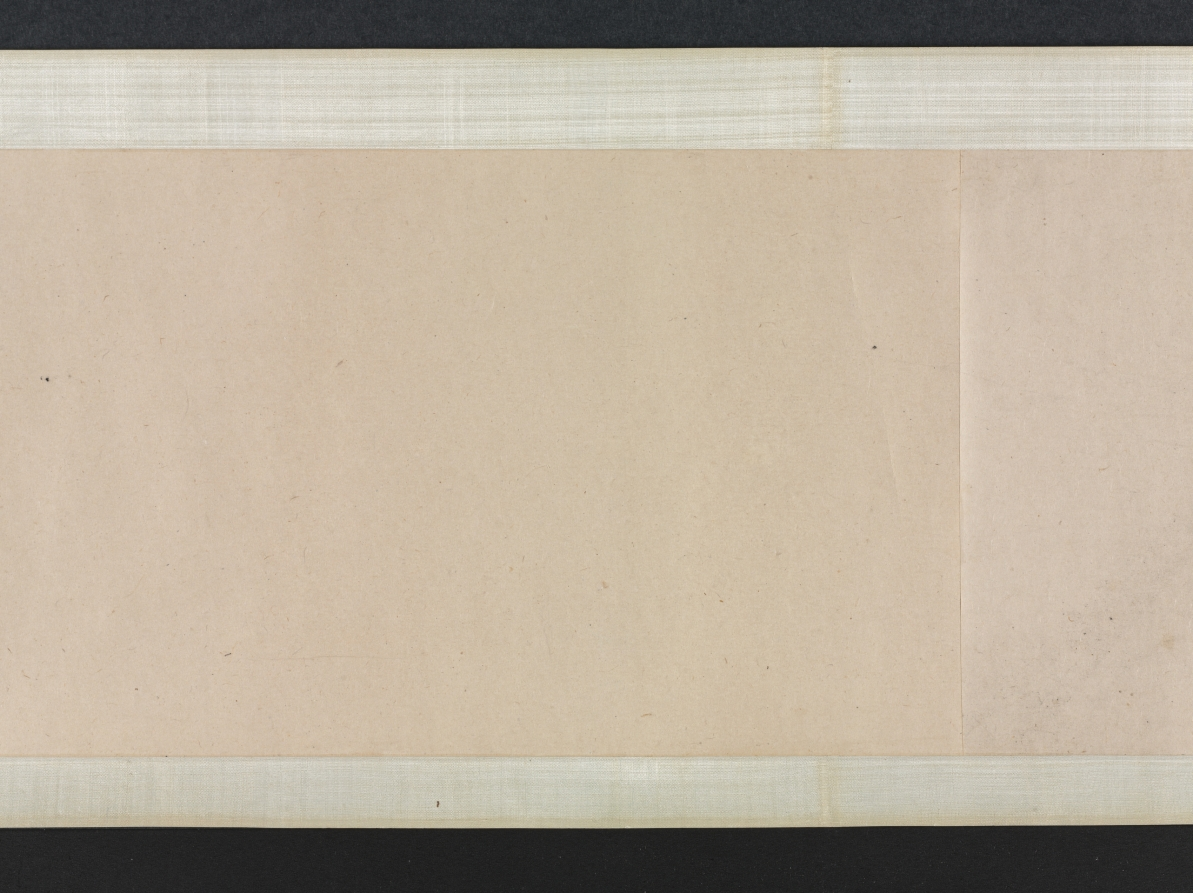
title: Saying Farewell at Xunyang (Song of the Pipa)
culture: China, Ming dynasty (1368–1644)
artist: Wen Boren (Chinese, 1502–1575)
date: 1500s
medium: handscroll, ink and color on paper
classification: Painting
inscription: "潯陽送客圖" 五峰山人文伯仁寫于停雲館中 [印] 文伯仁; 五峰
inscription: 2 colophons and 9 additional seals: 1 transcription of "Pipa xing 琵琶行” (Song of Pipa) and 3 seals of Zhu Yizun 朱彜尊 (1629-1709); 2 seals of Wu Rongguang 吳榮光 (1773-1843); 1 colophon, dated 1826, and 3 seals of Wu Xijia 吳錫嘉 (mid-1700s)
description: This handscroll depicts The Song of the Pipa, a poem by Bai Juyi 白居易 (772–846) written after the poet’s encounter with a pipa player on the Yangzi River. Expelled from her home city when her beauty and fame had faded, she played for the poet at night. Her musical performance and tragic life story resonated with Bai Juyi, who had just been demoted and exiled from life at court himself. The hazy, vast view and pale color tonalities of this painting illustrate these feelings of endless sadness, having lost one’s sense of purpose in life.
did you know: Wen Boren depicted the chilly autumn water with a fishnet pattern.